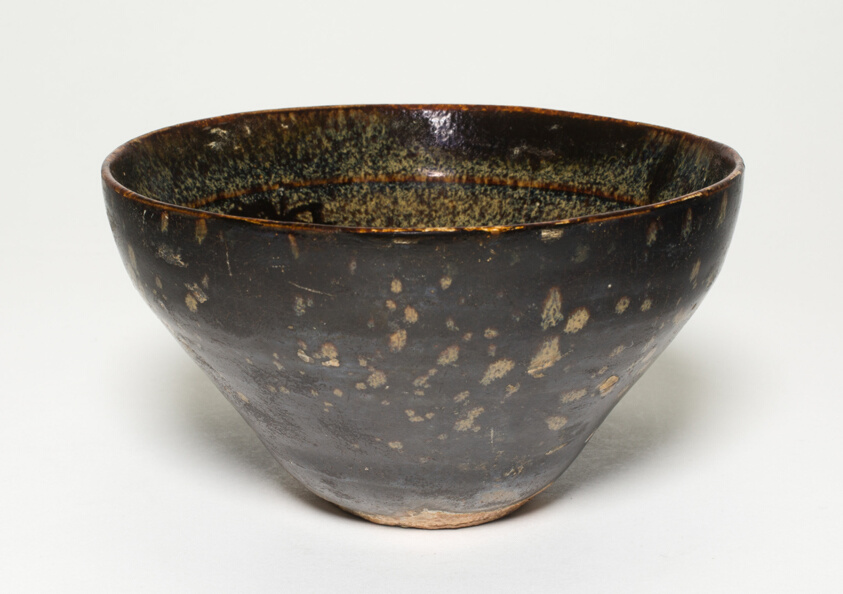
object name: Vessel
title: Bowl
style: Chinese (culture or style)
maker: China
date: Song dynasty (960–1279)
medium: Stoneware with black glaze and iron-brown splashes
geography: China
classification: bowl; stoneware; dish (vessel); asian art; ceramics; vessel